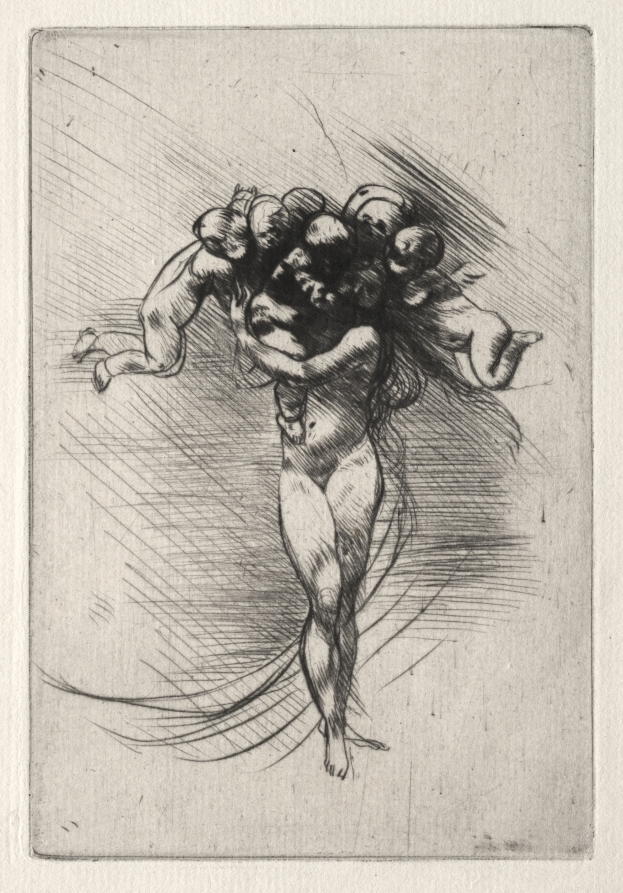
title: Le Printemps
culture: France, 19th century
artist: Auguste Rodin (French, 1840–1917)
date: 1883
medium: drypoint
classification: Print